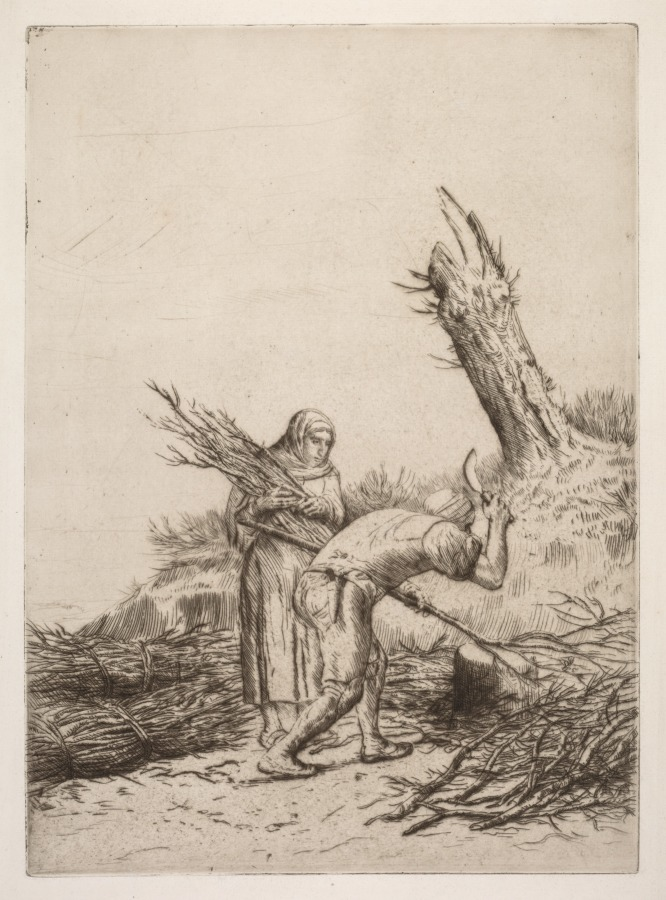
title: Les faiseurs de fagots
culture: France, 19th-20th century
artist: Alphonse Legros (French, 1837–1911)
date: c. 1857–1911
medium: etching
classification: Print